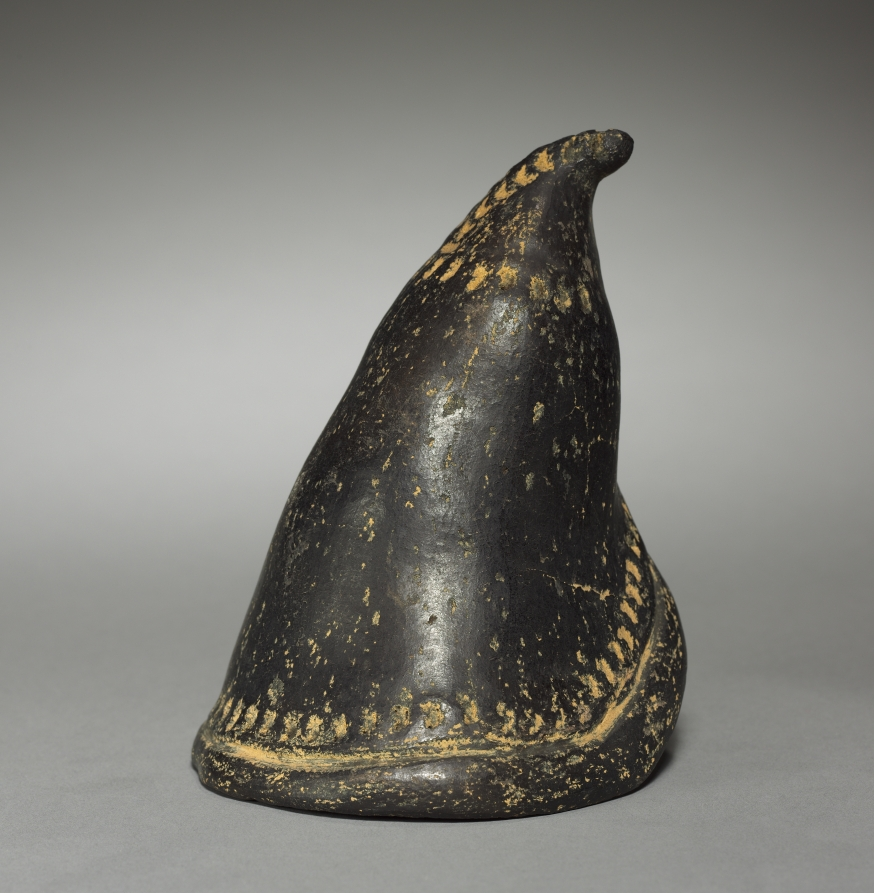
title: Ornament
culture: Colombia, 19th-20th century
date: before 1921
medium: black ware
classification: Ceramic